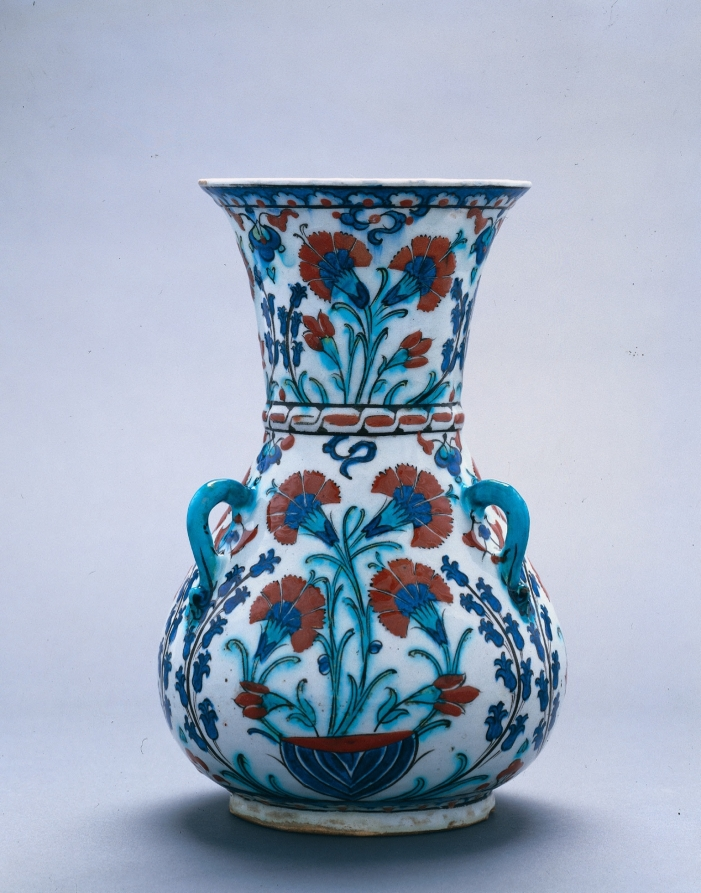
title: Mosque Lamp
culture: Turkey, Iznik, Ottoman period (1299–1922)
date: 1585–95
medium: Fritware with underglaze design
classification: Ceramic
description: Mosque lamps typically functioned as a lampshade, containing an oil lamp inside. Due to the opacity of this Ottoman lamp, it is likely that its primary function was not illumination. Instead, it would have been hung from chains in a mosque or mausoleum to add to the beauty of the space. This lamp is decorated with bright red carnations and blue hyacinths with additional floral and vegetal elements. The turquoise loops would have served for suspension from the ceiling. It is also possible that lamps like this were used as acoustic devices, softening the echo of prayer and discussion within the mosque’s halls.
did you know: Fritware is made of ground quartz, glass frit (partially fused glass), and a small proportion of fine white clay to approximate the light color and weight of Chinese porcelain.